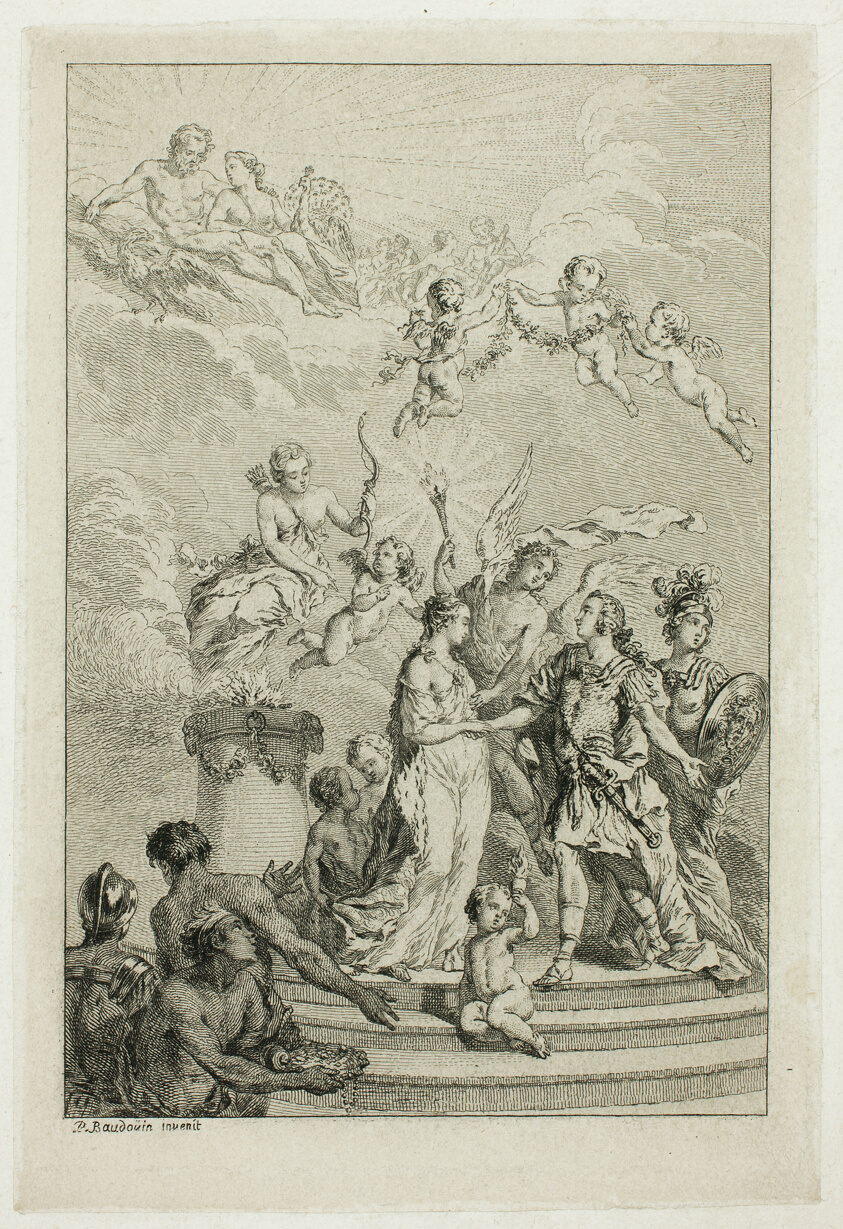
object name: Print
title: Allegory of the Marriage of the Dauphin Louis to the Infanta Maria Theresa of Spain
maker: Pierre Antoine Baudouin; French, 1723-1769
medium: Etching on cream paper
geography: France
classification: etching; print; prints and drawing